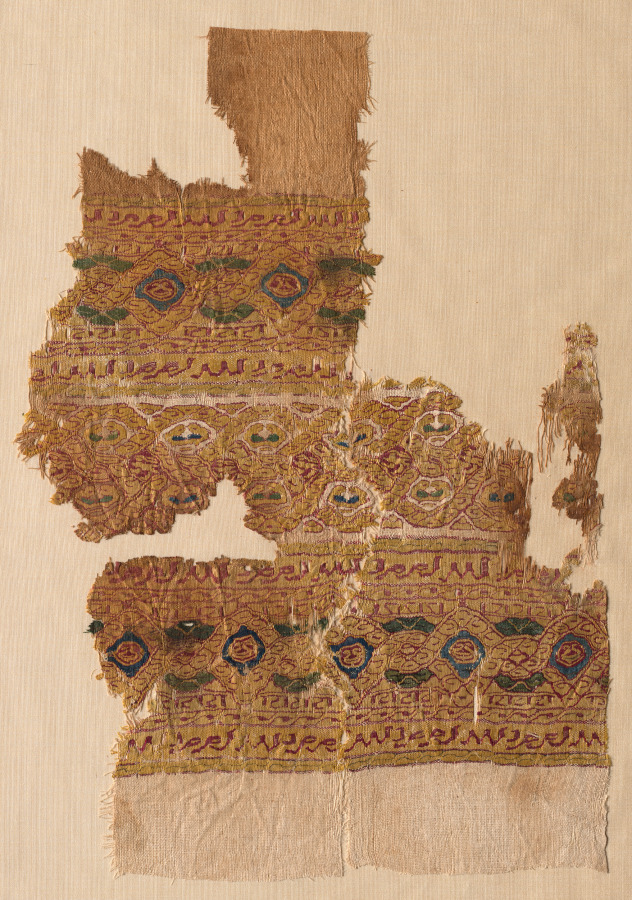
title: Fragment of a Tiraz-Style Textile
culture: Egypt, Fatimid period, Caliphate of al-Hafiz, AH 524-544 (A.D. 1130-1149)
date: 1130 – 1149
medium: tabby ground with inwoven tapestry ornament; linen and silk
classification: Textile